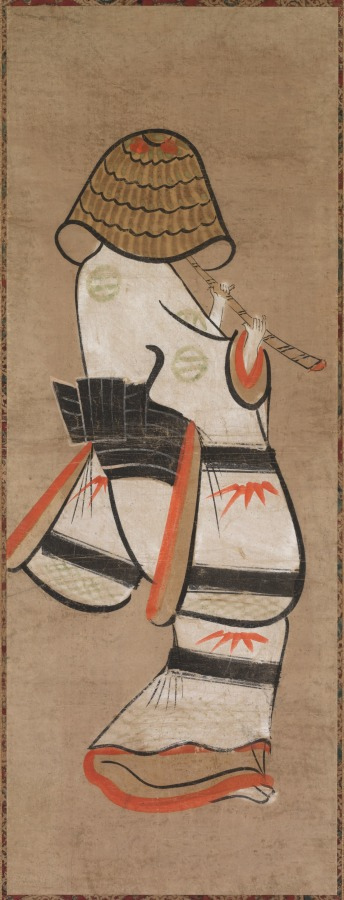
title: Woman as an Itinerant Monk: Onna Komuso (Otsu-e)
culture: Japan, Edo period (1615–1868)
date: late 1600s-early 1700s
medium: hanging scroll; ink and color on paper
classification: Painting